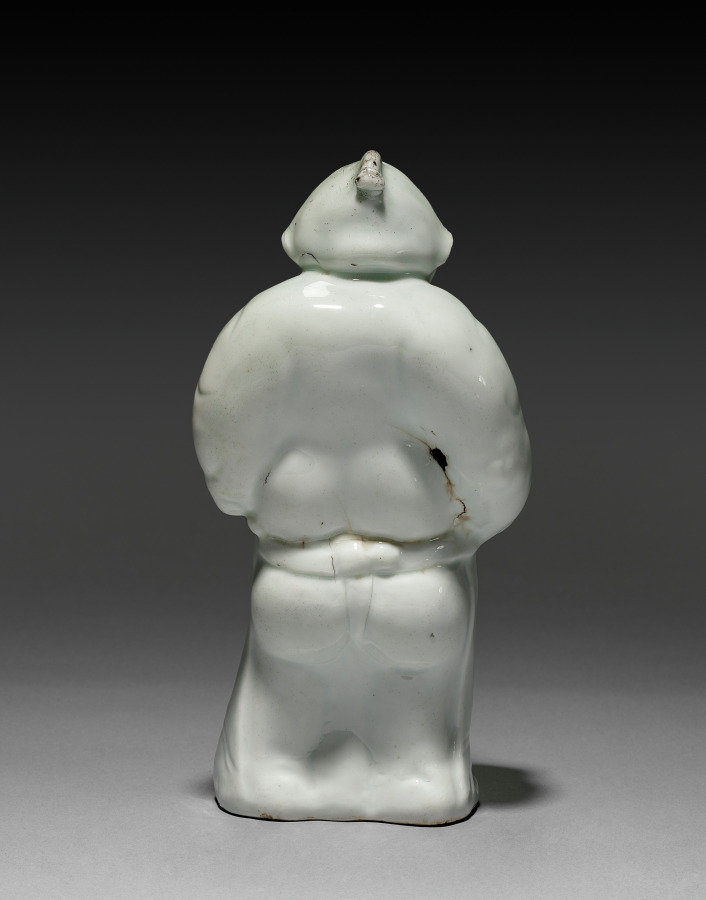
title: Standing Figure of a Sumo Wrestler, Arita Ware (?)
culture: Japan, Edo period (1615–1868)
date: 1700s-1800s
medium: porcelain, molded and carved, with celadon overglaze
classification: Sculpture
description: Catalogue of the Severance and Greta Millikin Collection (CMA, 1990): 85, no. 137.